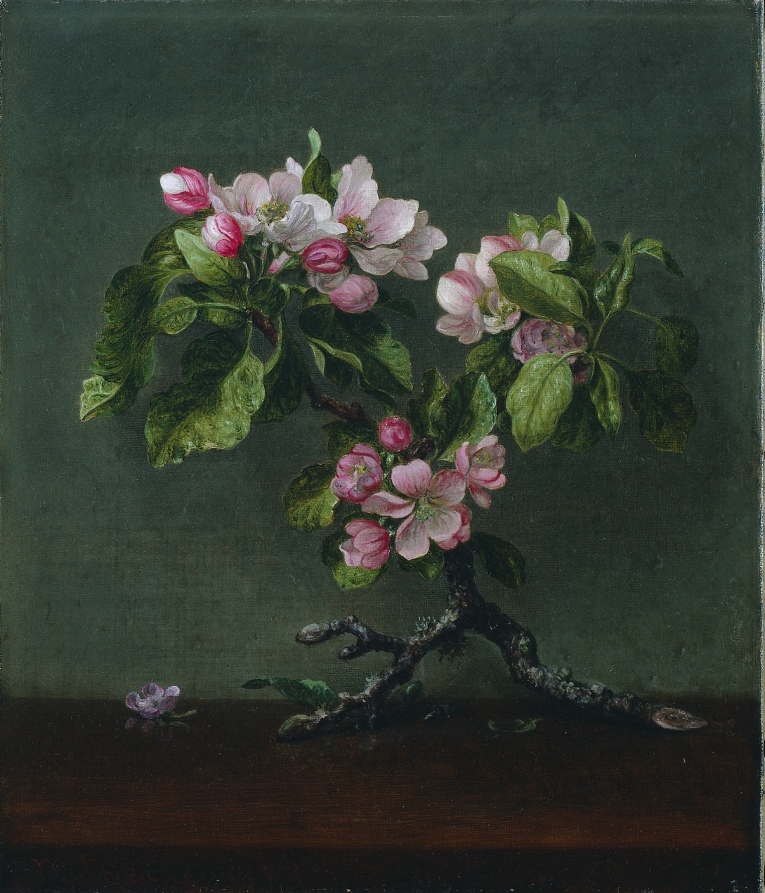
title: Apple Blossoms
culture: America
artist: Martin Johnson Heade (American, 1819–1904)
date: 1873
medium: oil on canvas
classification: Painting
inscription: signed lower left: MJ Heade 1873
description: Martin Johnson Heade painted approximately 150 floral still life compositions during his long career. In this relatively stark example, a single branch of apple blossoms is propped on a tabletop and supported by an undecorated wall.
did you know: The artist was very fond of flowers and took pleasure in gathering and arranging bouquets, especially for his breakfast table.